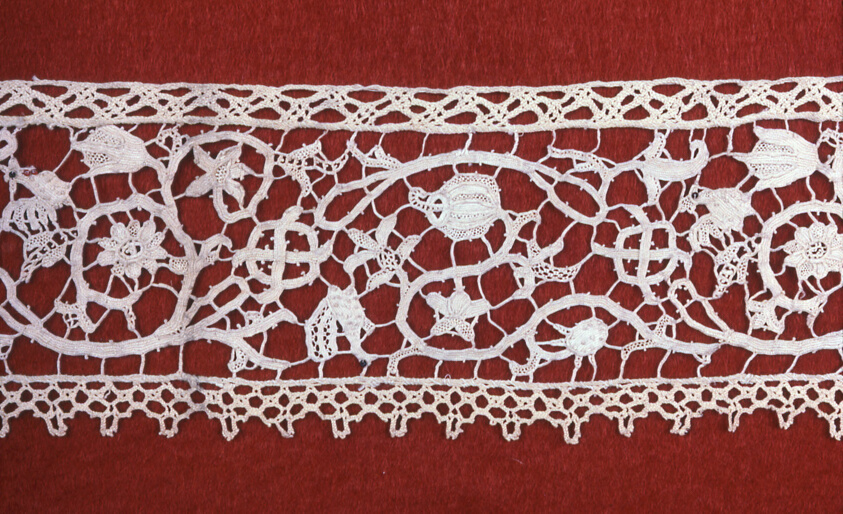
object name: Textile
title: Insertion (For a Cover)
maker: Italy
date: c. 1620/40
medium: Linen, needle lace; embellished with glass beads; edged with bobbin straight lace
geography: Italy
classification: textile; lace - needle